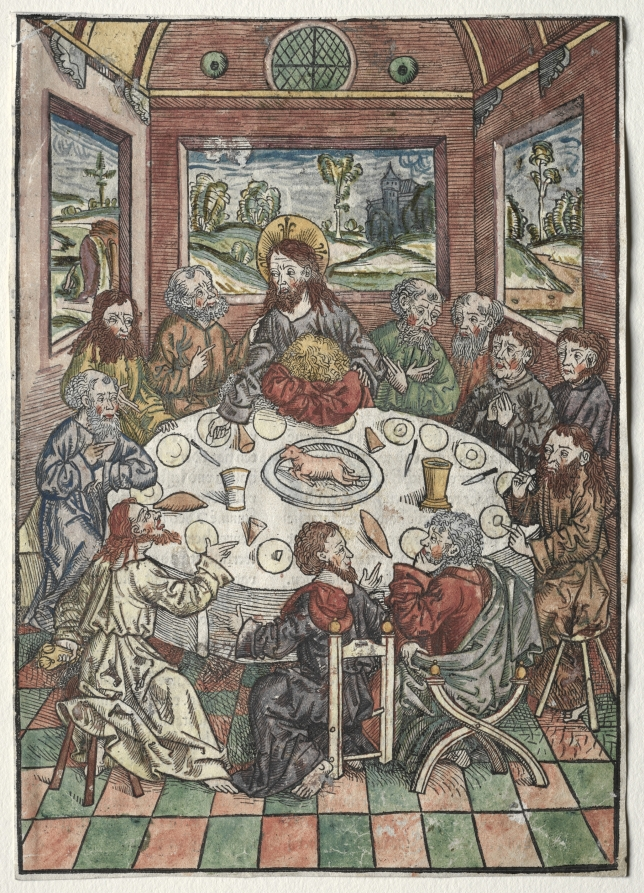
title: Der Schatzbehalter: The Last Supper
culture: Germany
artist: Michael Wolgemut (German, 1434–1519)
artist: Wilhelm Pleydenwurff (German, 1450–1494)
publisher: Anton Koberger (German, 1435-1513)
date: 1491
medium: color woodcut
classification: Print